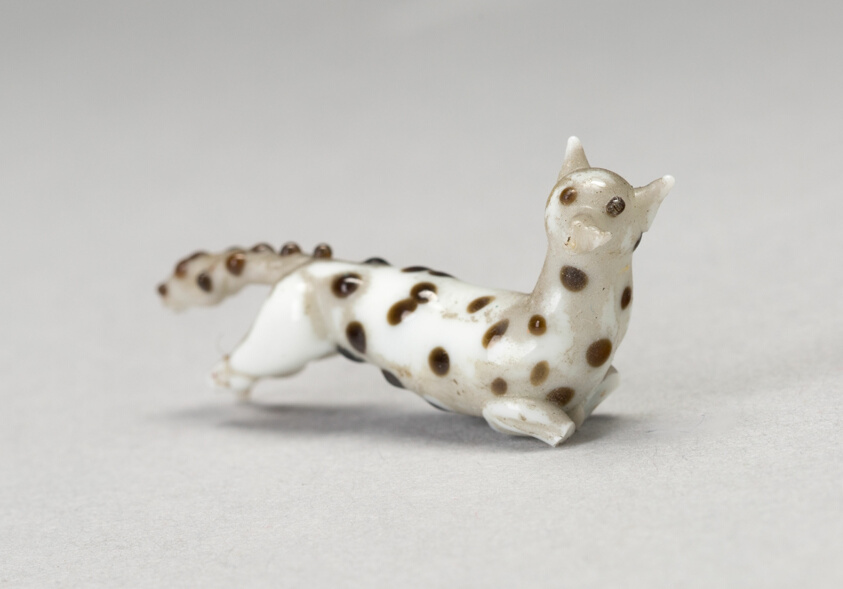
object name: Glass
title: Running Dog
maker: Nevers, France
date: c. 1850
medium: Glass; lampwork (verre de Nevers), metal armature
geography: France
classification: glass; miniature; decorative object/ornament; european decorative arts